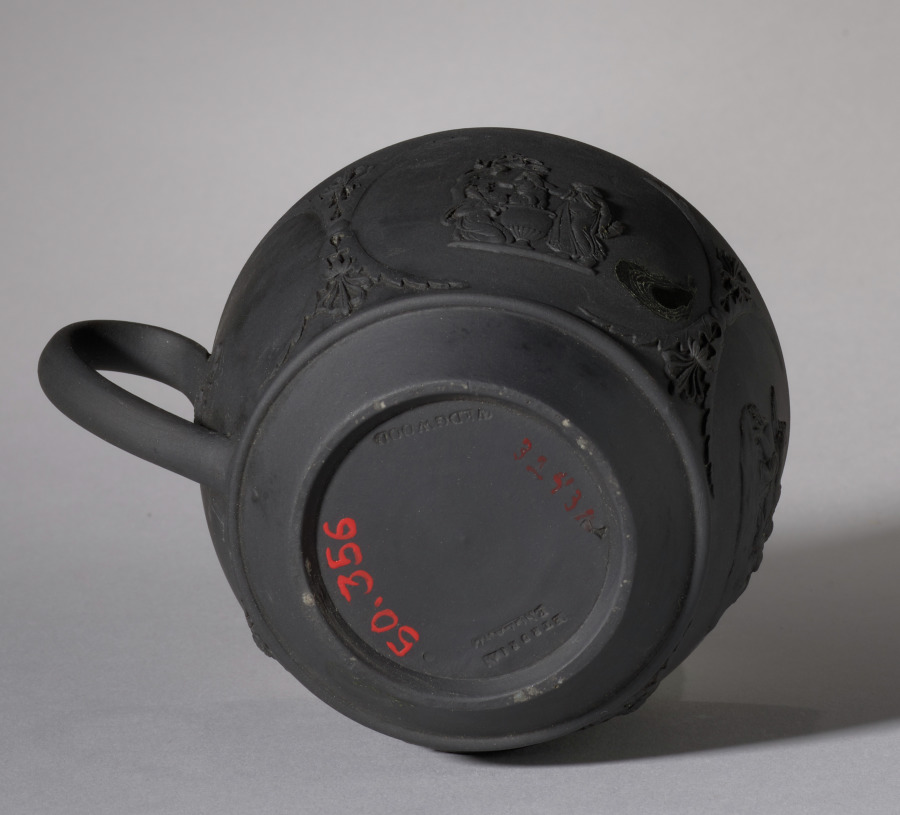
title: Cup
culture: England, Staffordshire, 19th century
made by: Wedgwood Factory (British)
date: 1800s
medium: black basalt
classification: Ceramic